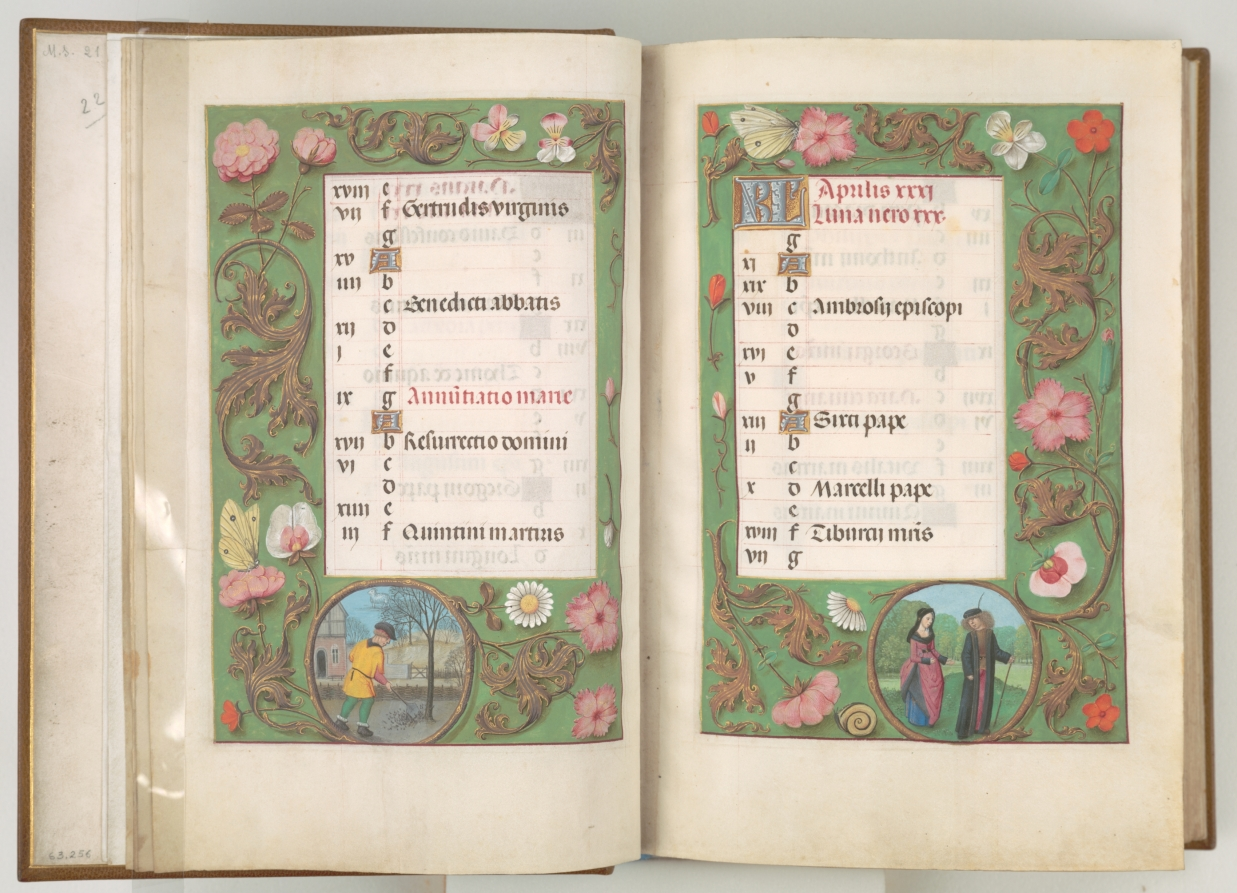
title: Hours of Queen Isabella the Catholic, Queen of Spain: Fol. 4v, March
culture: Flanders, Ghent and Bruges, late 15th century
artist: Master of the First Prayerbook of Maximillian (Flemish, c. 1444–1519)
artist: and Associates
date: c. 1500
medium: ink, tempera, and gold on vellum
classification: Bound Volume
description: This manuscript was illuminated by a circle of at least five highly organized manuscript painters active in the Flemish cities of Ghent and Bruges. The principal illuminator was Alexander Bening, who painted the majority of the book's miniatures. Manuscripts produced by this circle of artists are renowned for the decoration of their borders, which typically feature a rich variety of realistically painted flowers, birds, and butterflies. This prayer book, called a book of hours, was intended not for a cleric but for the private devotions of a lay person—in this case, Isabella the Catholic, Queen of Spain (1451–1504); her coat of arms embellishes the book's frontispiece. It is unlikely that the book was commissioned by the Queen herself; rather, she probably received it as a diplomatic gift from someone courting her patronage, perhaps Cardinal Francisco Jimenez de Cisneros. A Franciscan friar, Jimenez was dependent upon Isabella for his advancement, first to the post of Queen's confessor in 1492, and then to Archbishop of Toledo in 1495.